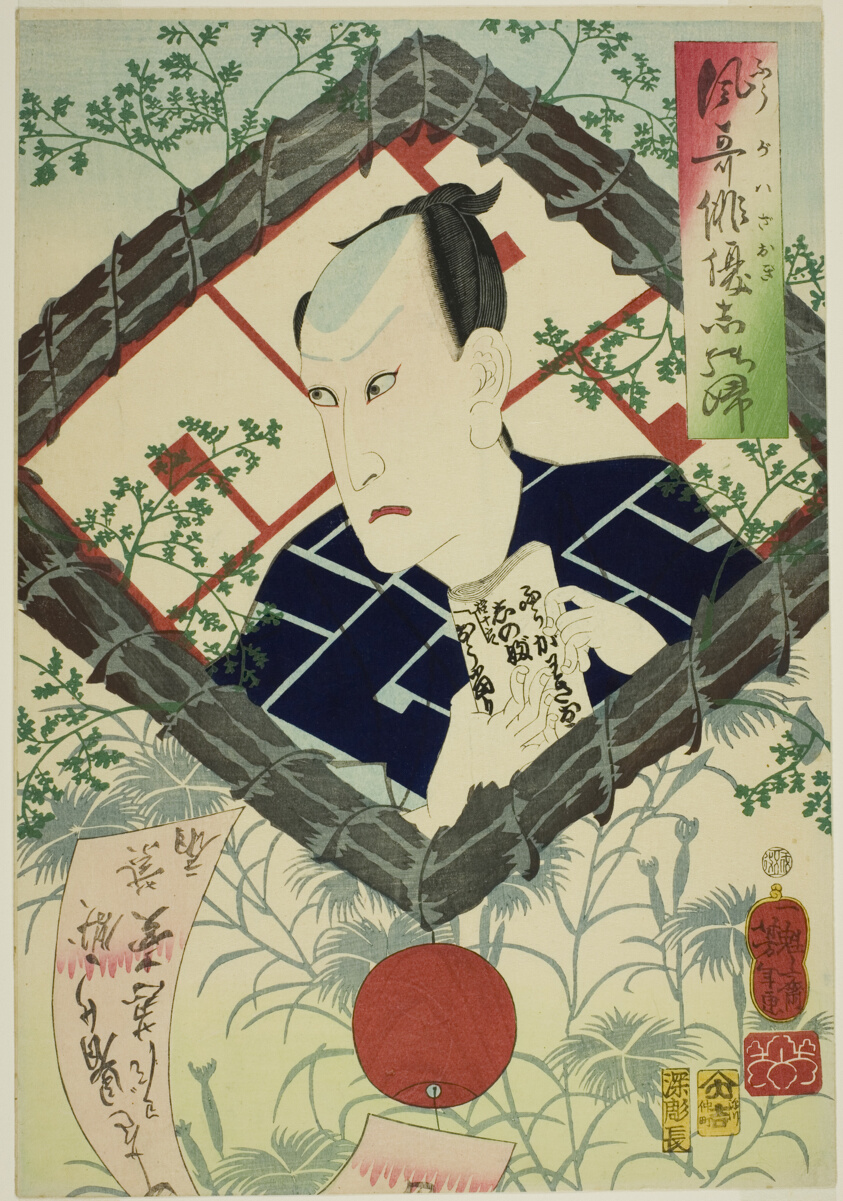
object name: Print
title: The Actor Kawarazaki Gonjuro I, from the series "Reminiscences of Elegant Actors (Fuga wazaogi shinobu)"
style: Japanese (culture or style)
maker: Tsukioka Yoshitoshi (Japanese, 1839-1892)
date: 1862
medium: Color woodblock print; oban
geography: Japan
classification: woodblock print; print; asian art